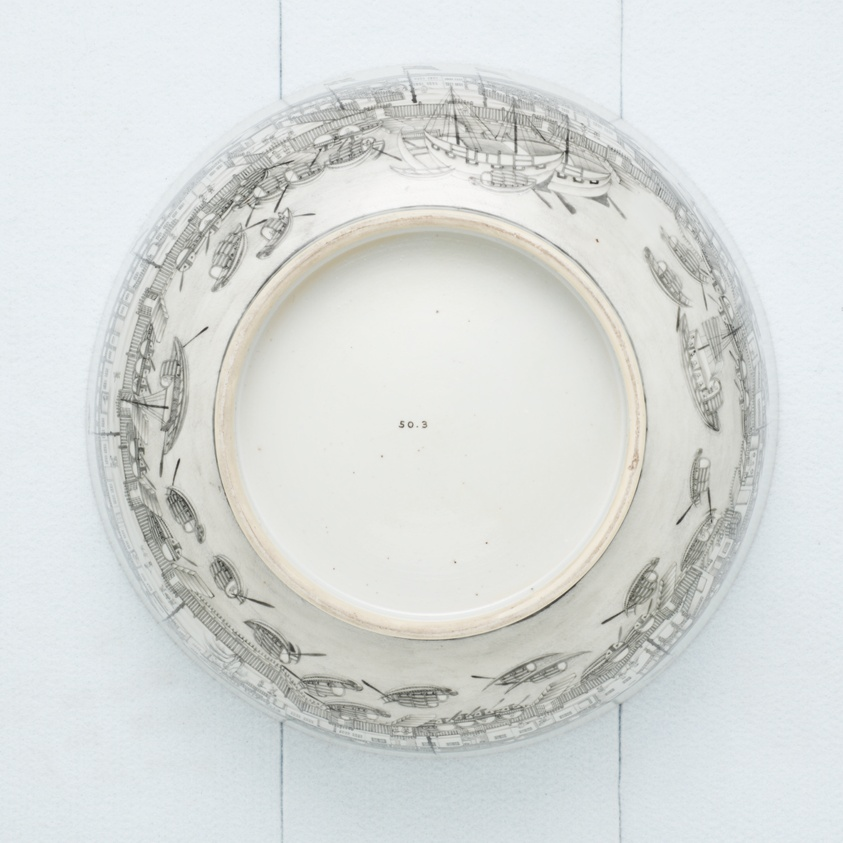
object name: Ceramics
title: Punch Bowl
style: chinese export, Export porcelain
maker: Artist unknown (Chinese, made for the American market); China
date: c. 1789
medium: Hard-paste porcelain, glaze, enamels in colors, gilding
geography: China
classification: punch bowl; chinese export porcelain; American market; art of the americas; ceramics; porcelain; decorative arts; pottery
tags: Canton, factory, port, cities, building, drinking